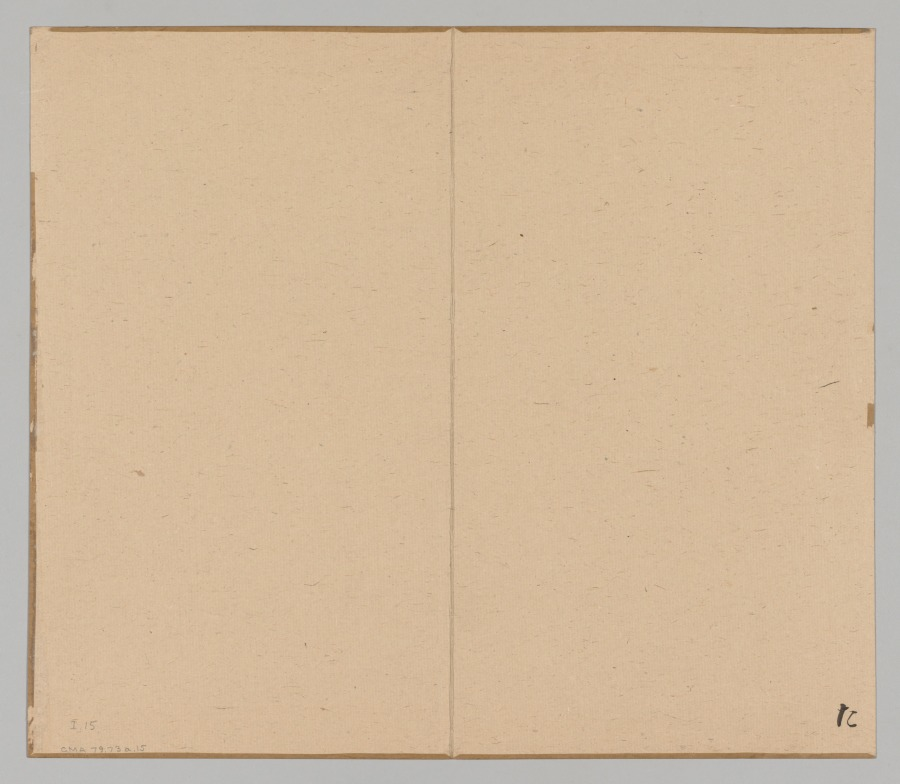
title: Reverberations of Taiga, Volume 1 (leaf 15)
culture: Japan, Edo period (1615–1868)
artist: Aoki Shukuya (Japanese, d. 1802)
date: mid- to late 1700s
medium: double-leaf from a pair of albums; ink and light color on paper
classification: Portfolio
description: Traditionally, young painters in Japan began their studies with an established master-painter. The master's compositions invariably became models that the apprentice copied to learn various ink and brush techniques. Shukuya was a pupil of the famous Kyoto artist Ikeno Taiga, whose style is reflected in these sketches of rocks, trees, and mountains.